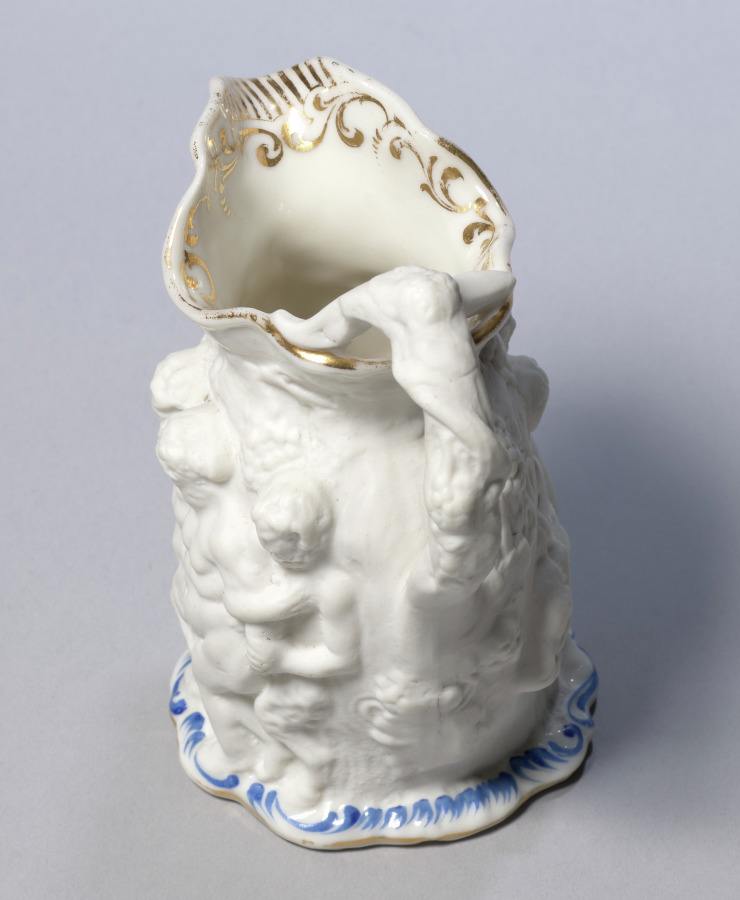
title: Jug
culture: France, 19th century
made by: Jacob Petit (French)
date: 1800s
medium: ceramic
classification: Ceramic